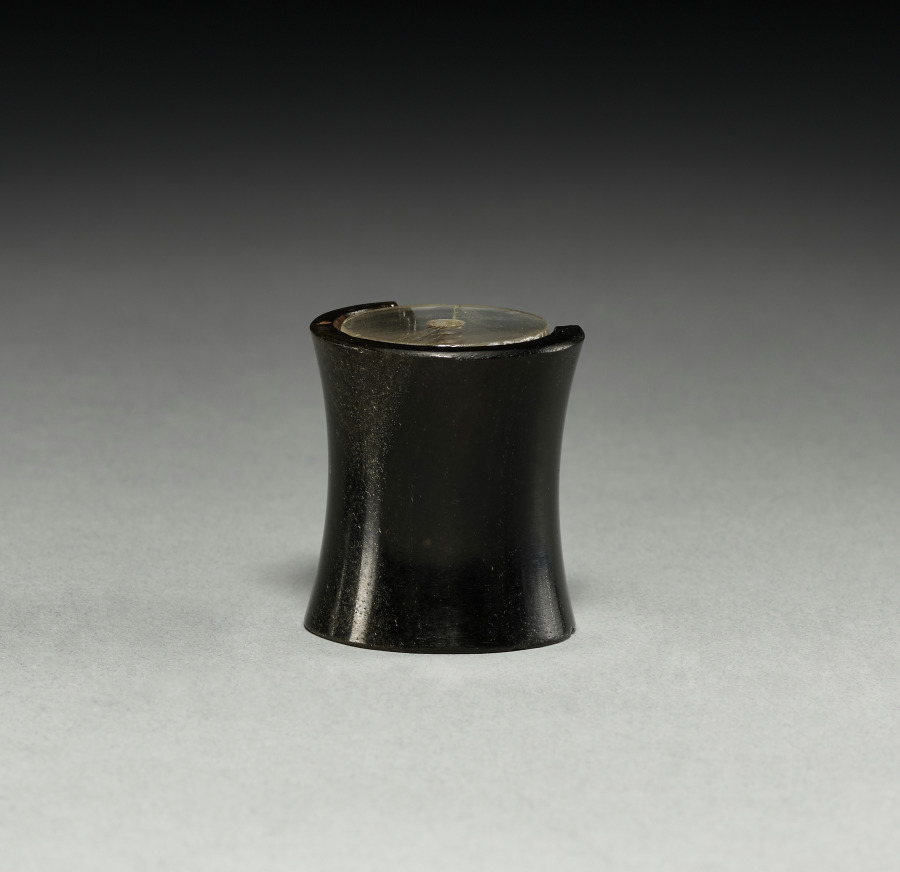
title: Ear Ornament (2 of 2)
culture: Mexico, Guerrero, Ichcatiopan, Mixtec or Aztec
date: c. 1200–1519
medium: obsidian, crystal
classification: Jewelry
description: This set of ear ornaments was reputedly found together with the gold and jade pectoral ornament shown nearby. They may have accompanied a noble burial, or perhaps constituted an offering deposit.